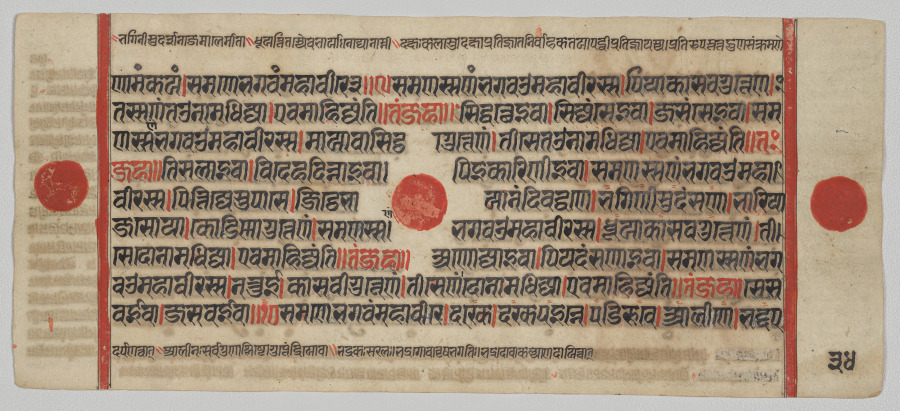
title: Text, Folio 34 (verso), from a Kalpa-sutra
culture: Western India, Gujarat, last quarter of the 15th century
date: c. 1475–1500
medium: Gum tempera, ink, and gold on paper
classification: Painting